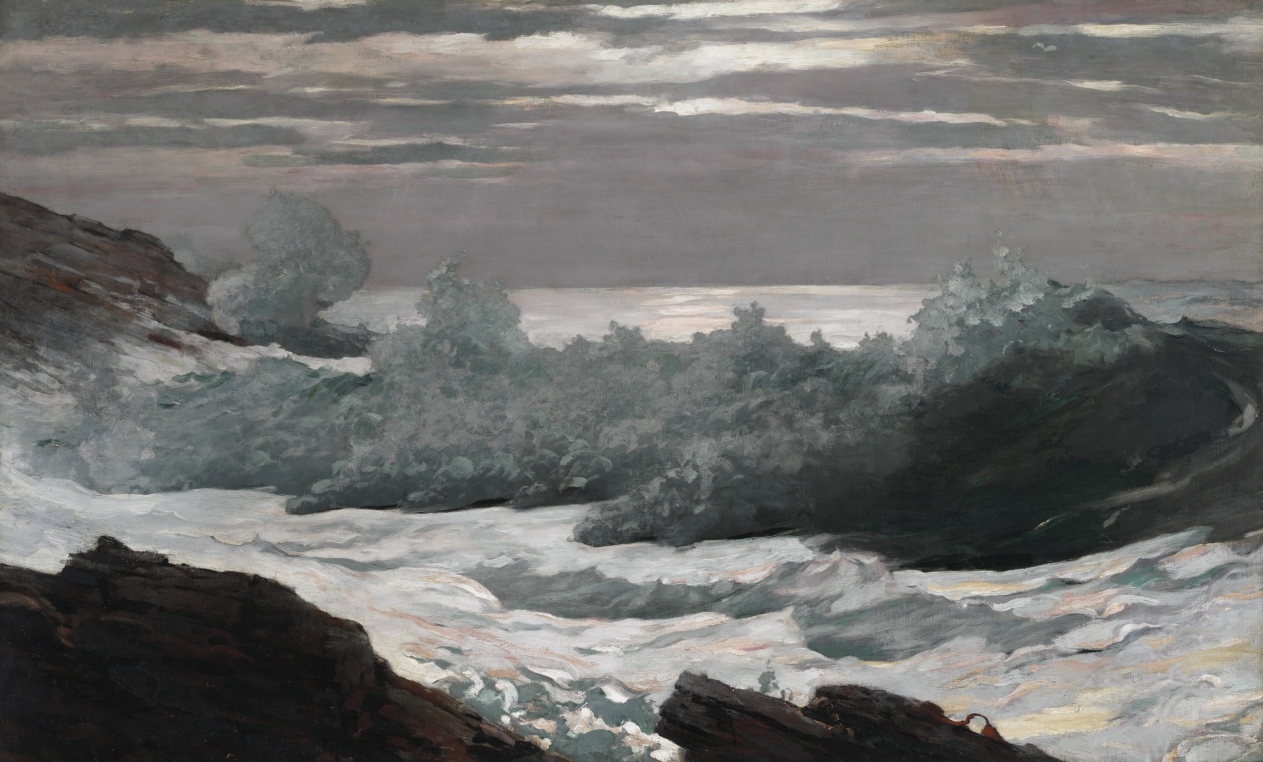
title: Early Morning After a Storm at Sea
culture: America, late 19th-early 20th Century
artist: Winslow Homer (American, 1836–1910)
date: 1900–1903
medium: oil on canvas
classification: Painting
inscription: Signed lower left: "HOMER / 1902"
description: The powerful Atlantic surf pounding against the desolate coast of Prouts Neck, Maine, provided primary subject matter for the dramatic paintings that Homer created during his final decades. This example, which the artist proclaimed as "the best picture of the sea that I have painted," was initially conceived as a watercolor. Undertaking the composition in oil after a lapse of nearly two decades, Homer patiently waited for the appropriate atmospheric conditions, executing the work in four different sessions spread over two years.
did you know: Winslow Homer's studio in Prouts Neck, Maine, is a National Historic Landmark.